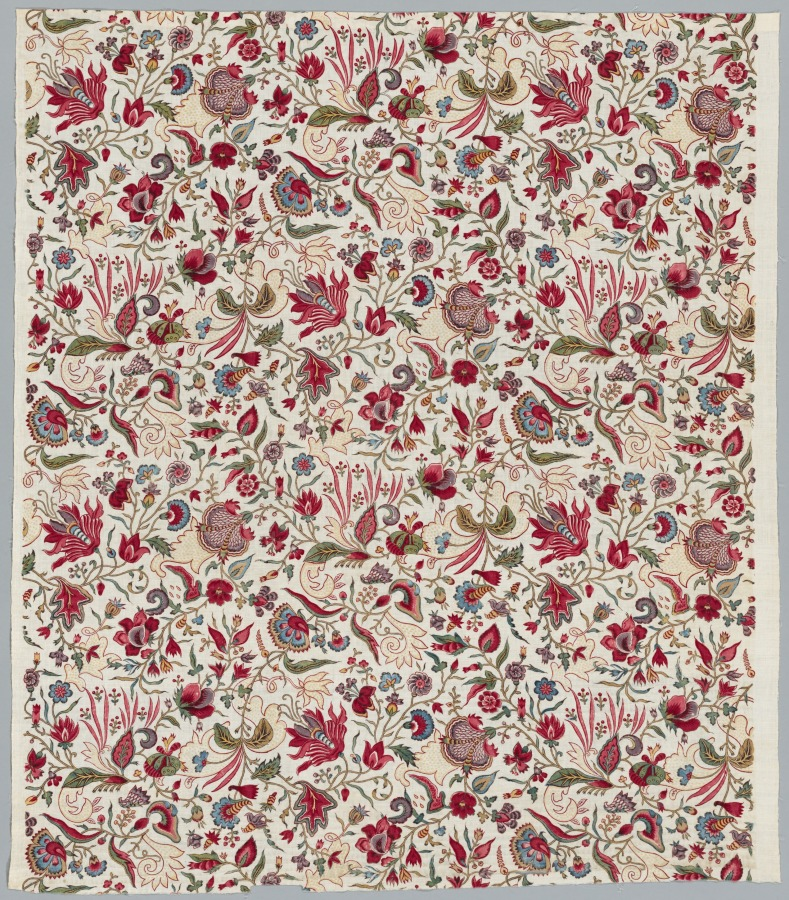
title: Fragment of a Quilted Skirt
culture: England, late 18th century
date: c. 1785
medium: woodblock print on cotton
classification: Textile